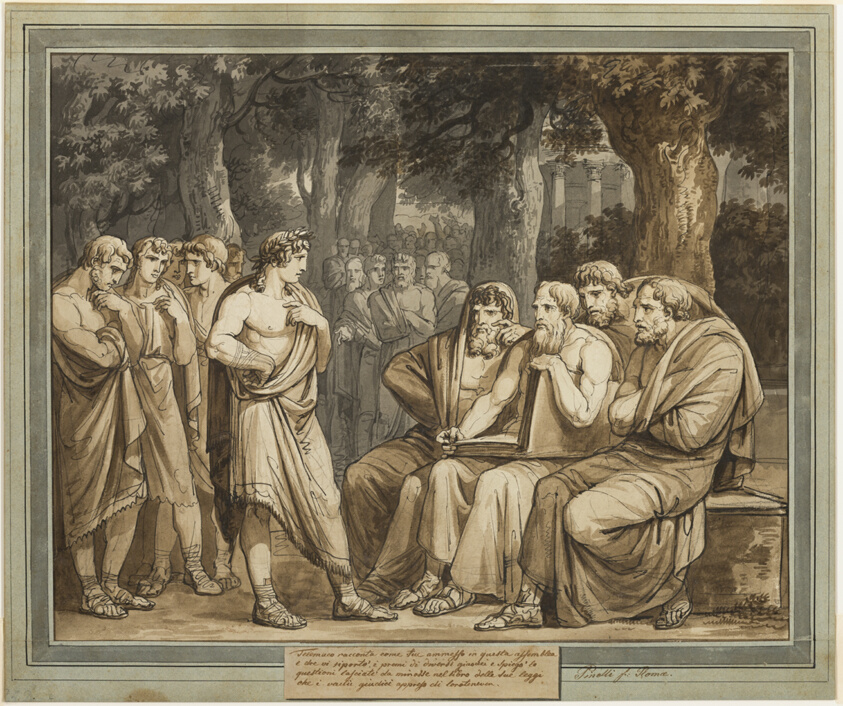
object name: Drawing and Watercolor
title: Telemachus Describes How He Was Admitted into the Assembly in Crete, from The Adventures of Telemachus, Book 5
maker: Bartolomeo Pinelli (Italian, 1781-1835)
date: 1808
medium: Pen and black ink, with brush and dark gray and brown wash, over traces of black chalk on ivory laid paper, laid down on board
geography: Italy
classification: drawings (visual works); prints and drawing